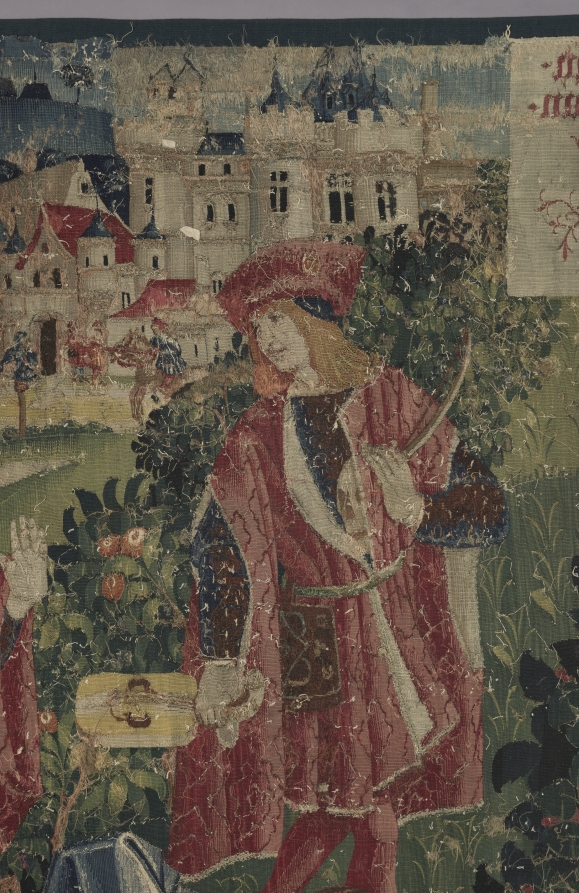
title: Youth (from Chateau de Chaumont set)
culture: France, Lyon(?), early 16th century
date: 1512–15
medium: silk and wool; tapestry weave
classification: Tapestry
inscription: French verse in Gothic letters translates as follows: Youth triumphs while its heart is healthy, And when it seems to hold all in its hand. But this triumph is without eternity. Here one sees the example full well: Those who are happy hide death in thier heart. Let the young heed this warning.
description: Louise of Savoy (1476-1531), queen mother of King Francis I, is depicted here in a sumptuous brocaded velvet in the center. She addresses youthful figures including Éléonore, Pierre Sala’s daughter who is facing her future husband, Hector. On the right, King Louis XII (died 1514) stands in front of the Chateau Langais where he had married Anne of Brittany. Above is Hector’s deceased father with a partially concealed skull under his robe, while a woman expresses surprise at the sight. The verse in Old French at the top states that youthful happiness is not eternal: Youth makes sounds as long as its heart is healthy, And thinks that it holds all in its hand. But this triumph is not eternal. Here you see clearly an example: He that is happy has death in his breast. Of this you people should take note.